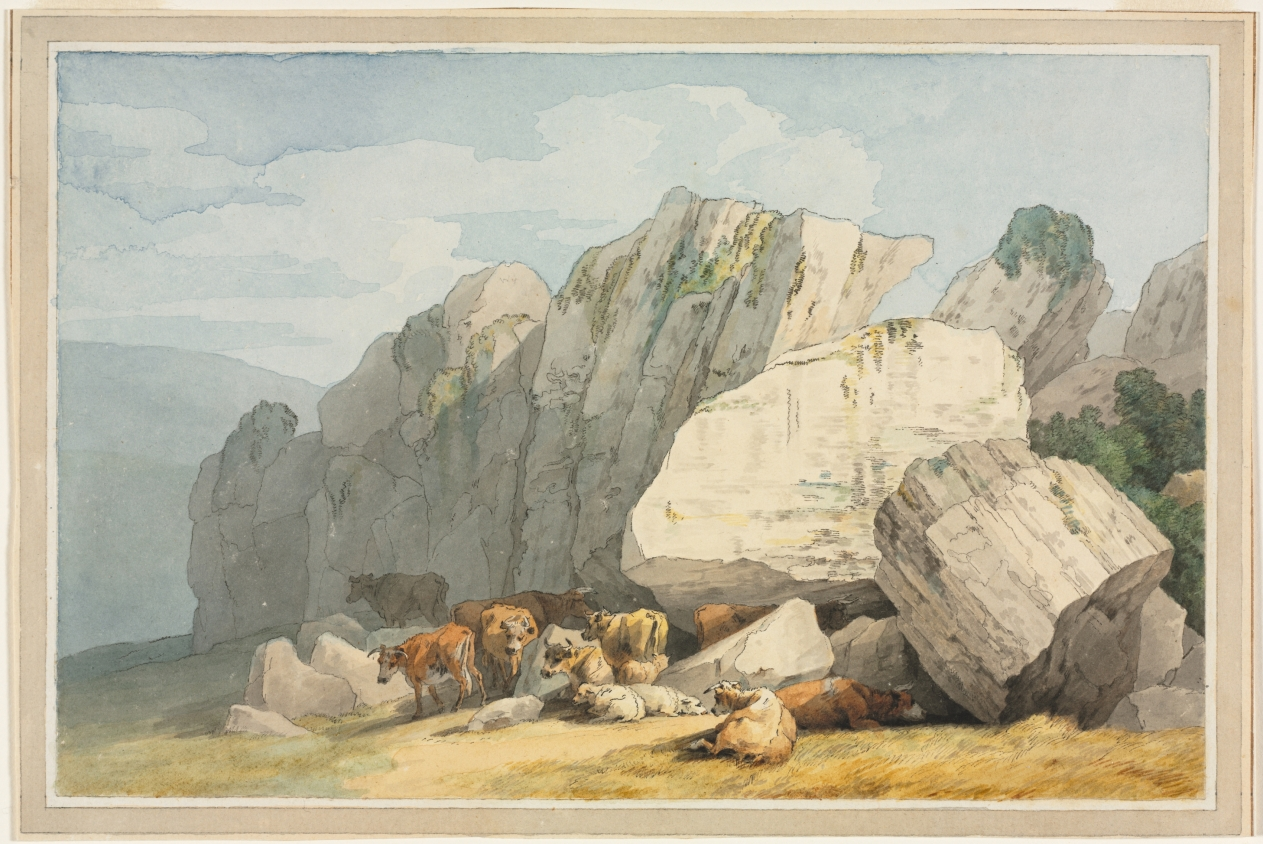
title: Leigh Tor Rocks at Poundsgate, near New Bridge on the Dart, Devon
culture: England, 19th century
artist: John White Abbott (British, 1763–1851)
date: 1800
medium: watercolor with pen and black ink and traces of graphite underdrawing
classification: Drawing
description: This closely observed watercolor was made in Dartmoor—an expanse of moorland in southwest England capped with a series of more than 100 exposed granite hilltops known as "tors," ranging from the monolithic to the nondescript. John White Abbott chose a low vantage point that accentuated the looming immensity of the outcrop in whose shelter a herd of cows has converged. Almost austere in its lack of superfluous detail, this small sheet suggests the untamed quality of the Devon moors.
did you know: In addition to working as a watercolorist, John White Abbott served professionally as an apothecary and surgeon.